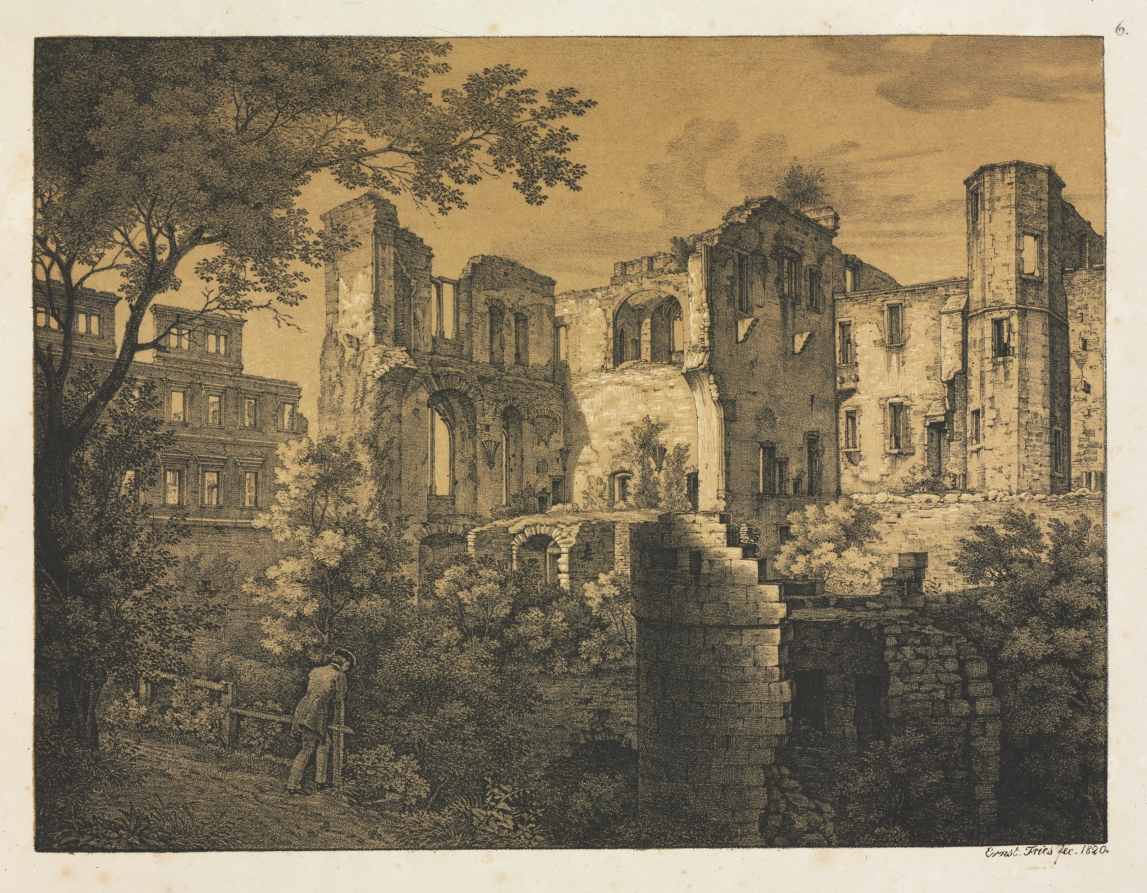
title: Six Views of Heidelberg Castle: Western Part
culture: Germany, 19th century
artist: Ernst Fries (German, 1801–1833)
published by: Mohr & Winter, Heidelberg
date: 1820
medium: lithograph printed in black and a deep ochre tint stone overall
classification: Print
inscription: Inscribed in graphite upper right: 6.; lower right margin: ? Heidelberger Schloss